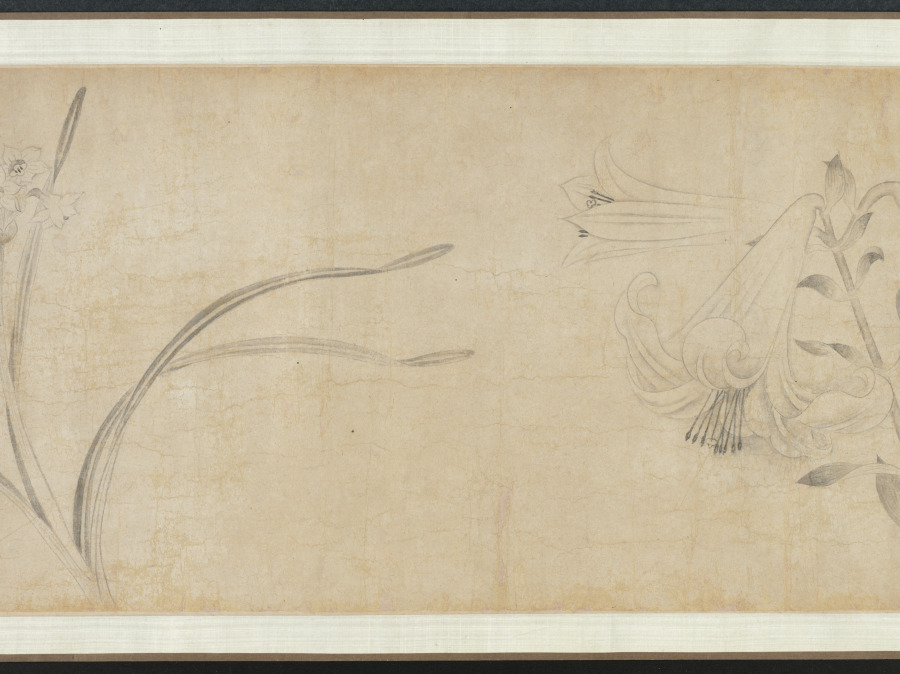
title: Ink Flowers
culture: China, Yuan dynasty (1271-1368)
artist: Zhao Zhong (Chinese, second half of the 1300s)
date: 1361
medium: Handscroll; ink on paper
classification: Painting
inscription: 寶帶同心結，香羅合歡扇。/ 繡作錦鴛鴦，雙雙為君獻。/ 薔薇露灑熏籠衣，馨香奉君君勿違。 原初并題。 [印] 趙衷原初畫記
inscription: 翠袂素羅韈，玉臺黃金盃。浩歌渡弱水。天風卷海三山開，麻姑方平為招飲，蛟宮獻舞銀濤堆。 原初并題。 [印] 雲林清趣、[印] 趙衷原初畫記。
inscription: 右用湯叔雅慶元中所寫墨花法作此卷，又效李長吉體賦詩以題之。詩與畫雖未工，要皆出於古人之餘，譬猶欲成方圓而必求其規矩之用也，識者毋誚焉！至正辛丑八月望日，東吳野人趙衷原初謹識。 [印] 趙原初、[印] 傳世清玩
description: Zhao Zhong's flowers, each paired with a poem, echo the fine-style colored flowers of the academic tradition, but instead he used only ink. Fine lines define the contours of each plant, as well as the veins within each petal and leaf. Careful ink washes give subtle modeling to the forms. The combination of lily, narcissus, and peony is unusual as the three belong to no known seasonal or symbolic system popular in the fourteenth century. Zhao’s medical training may have influenced the selection. Powdered lilies, for example, were prescribed to dispel grief, while the bark of tree peony roots was used as a treatment for various blood disorders.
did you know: This handscroll is a very rare example of ink flowers in the linear baimiao style of the fourteenth century.